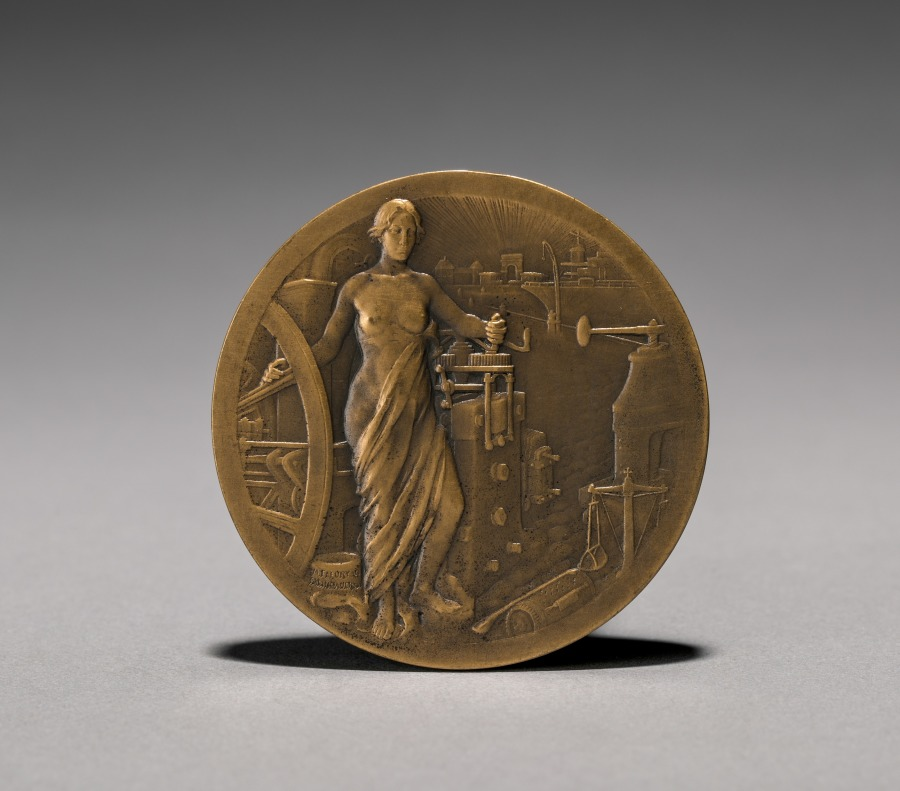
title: Medal (obverse)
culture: France, 20th century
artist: Edmond-Eugene-Emile Lindauer (French, 1869–1942)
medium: bronze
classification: Metalwork